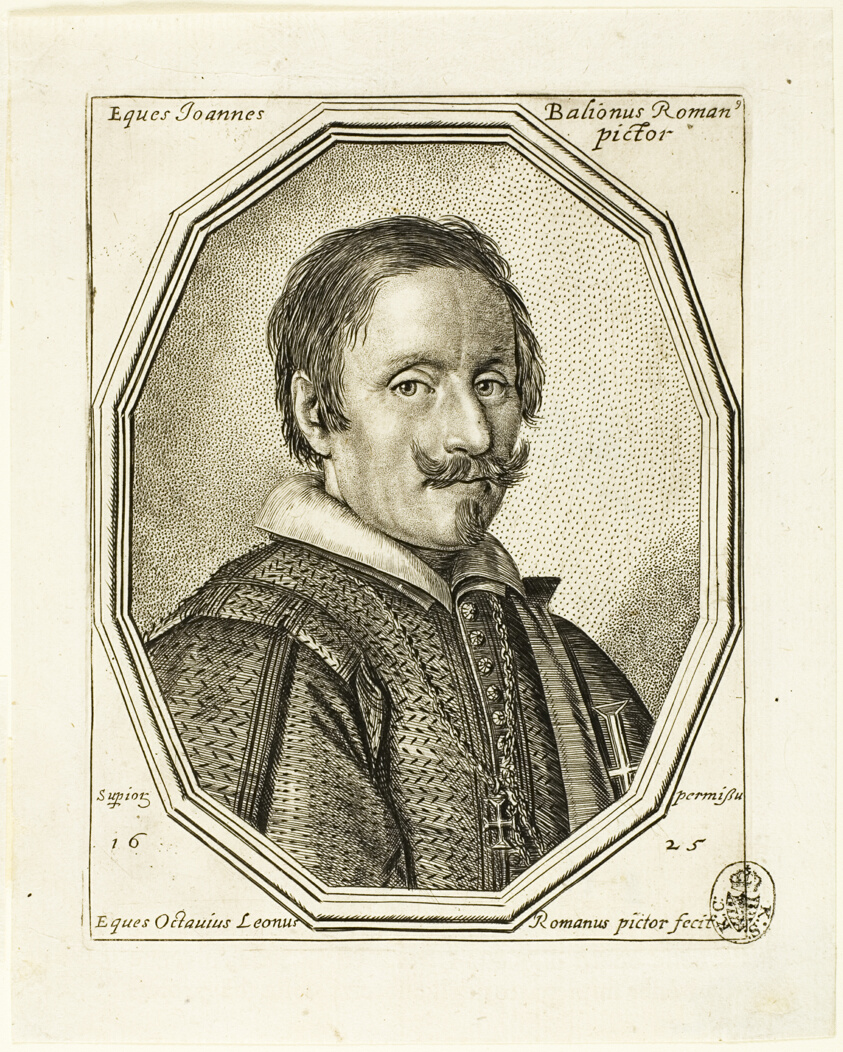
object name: Print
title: Giovanni Baglione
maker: Ottavio Mario Leoni; Italian, 1578-1630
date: 1625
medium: Engraving on ivory laid paper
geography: Italy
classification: etching; print; prints and drawing